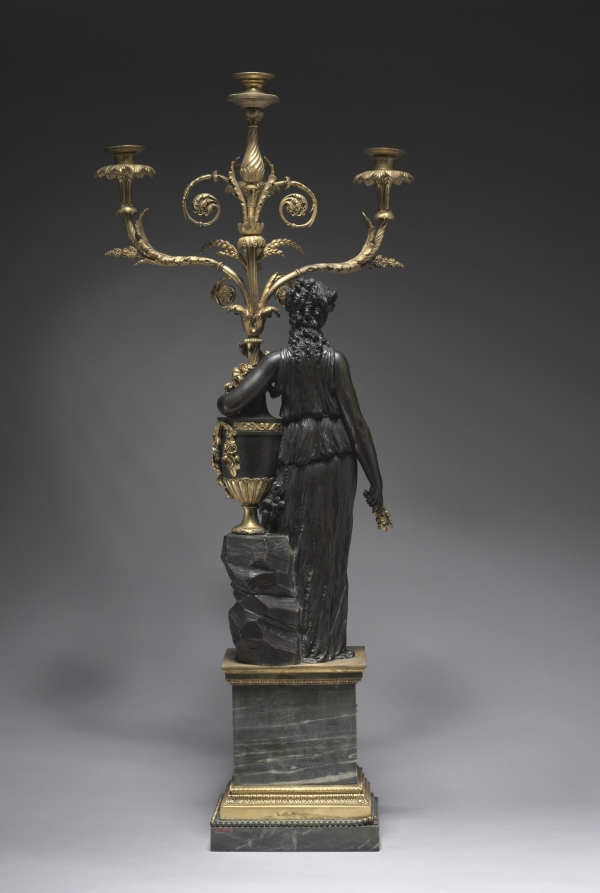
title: Candelabrum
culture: France, 18th century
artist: attributed to Pierre Philippe Thomire (French, 1751–1843)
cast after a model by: Clodion (French, 1738–1814)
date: c. 1780–1785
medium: bronze, gilt bronze, gray marble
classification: Sculpture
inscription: signed behind rock: CLODION.